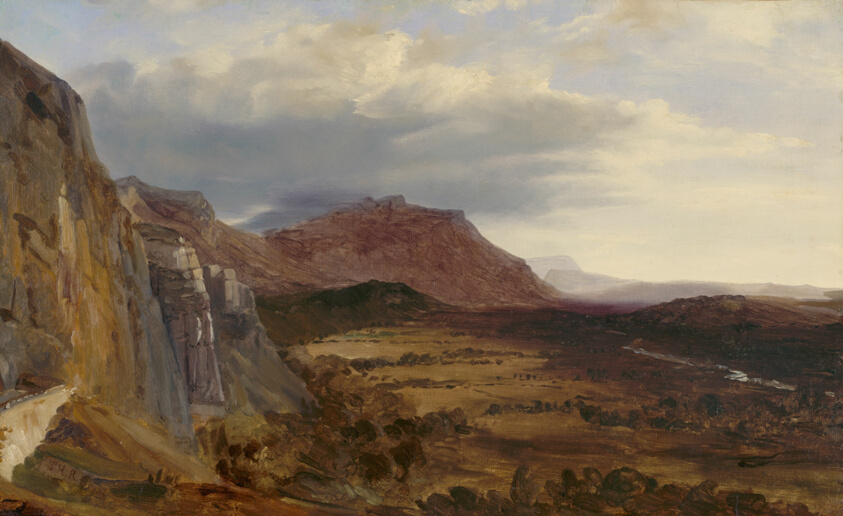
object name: Painting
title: View of Saleve, near Geneva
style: nineteenth century, 19th century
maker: Théodore Rousseau (French, 1812–1867)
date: 1834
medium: Oil on paper, mounted to canvas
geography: France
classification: painting; paint; oil paintings (visual works); french; european painting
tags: landscape, wilderness, weather/seasons, trees, sky, nature, landscapes, foliage, clouds